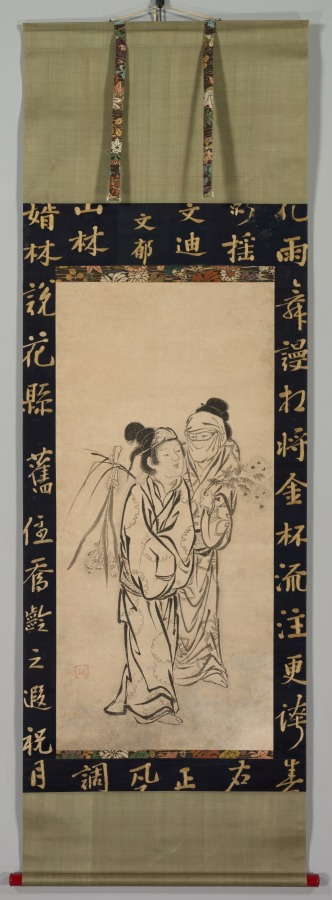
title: A Couple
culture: Japan, Momoyama period (1573–1615)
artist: Hasegawa Sōen (Japanese)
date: late 1500s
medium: hanging scroll; ink on paper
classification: Painting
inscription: Artist's seal at lower left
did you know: The person on the right holds a spray of chrysanthemums, while the other has daffodils suspended upside down from a stalk held over their shoulder.